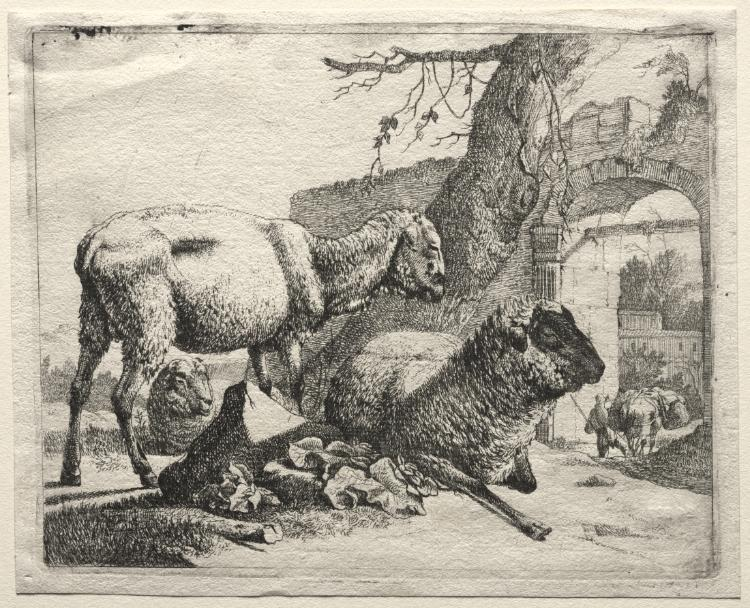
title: The Muleteer under the Gateway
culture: Germany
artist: Johann Heinrich Roos (German, 1631–1685)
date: 1665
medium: etching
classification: Print